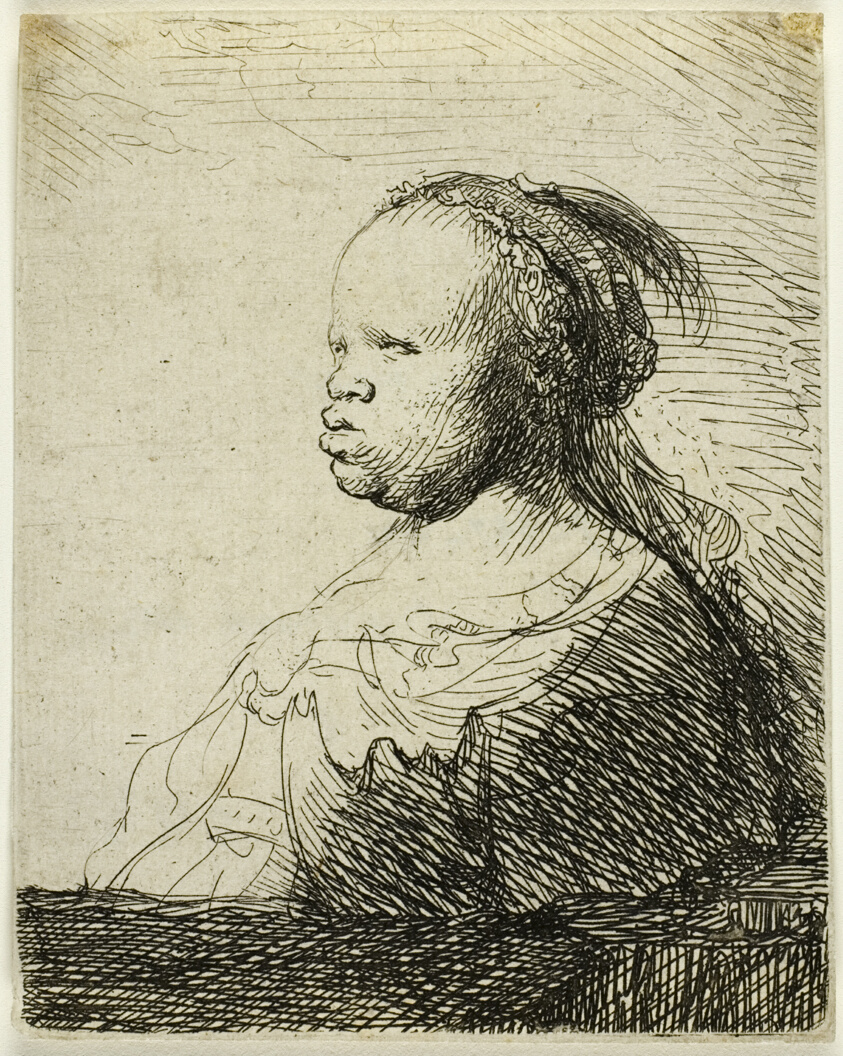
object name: Print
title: An African Woman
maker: Rembrandt van Rijn (Dutch, 1606-1669)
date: c. 1630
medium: Etching in black ink on cream laid paper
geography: Holland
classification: etching; print; prints and drawing; paper